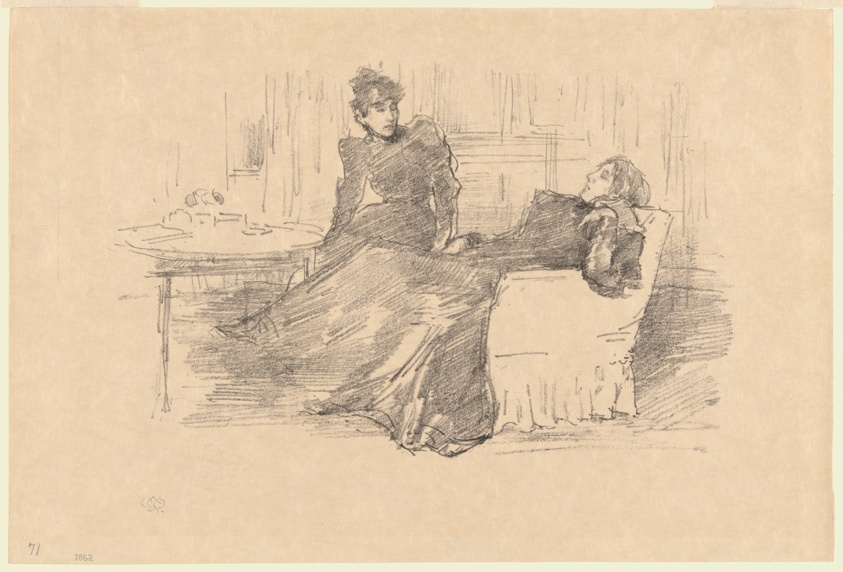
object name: Print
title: The Sisters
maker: James McNeill Whistler (American, 1834-1903)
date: 1894/95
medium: Transfer lithograph in black with scraping, on cream wove Japanese vellum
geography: United States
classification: transfer lithograph; lithograph; print; prints and drawing